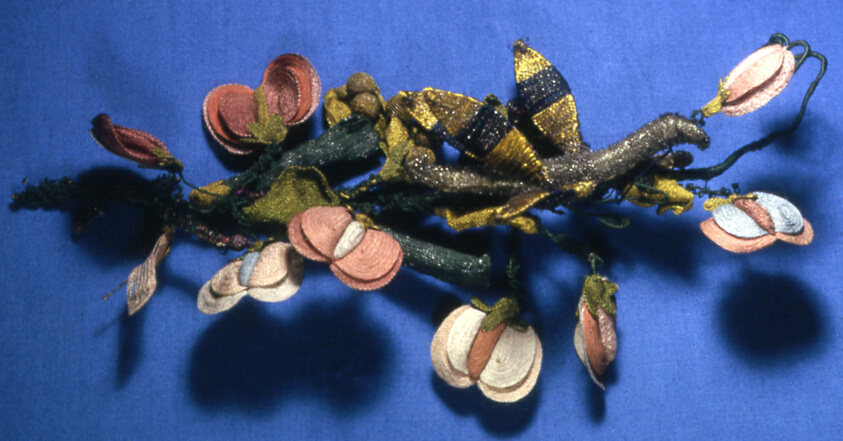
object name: Textile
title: Hair Spray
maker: England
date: 1650/70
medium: Wire foundation; silk threads and metal wires; worked in buttonhole stitches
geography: England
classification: textile; accessories (object genre); headdress - misc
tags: fashion